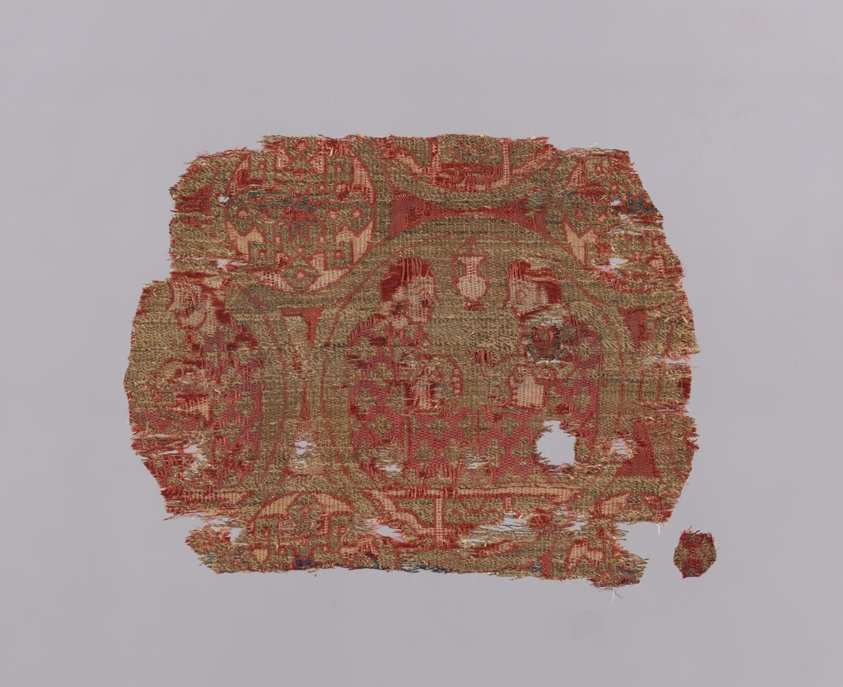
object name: Textile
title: Fragment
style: hispano-moresque, medieval, european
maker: Spain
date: 13th/14th century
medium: Silk and gilt animal substrate wrapped silk, weft-faced three and four color complementary weft plain weave with inner warps and areas of detached plain weave of inner warps and complementary ground wefts (red)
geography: Spain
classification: textile; weaving